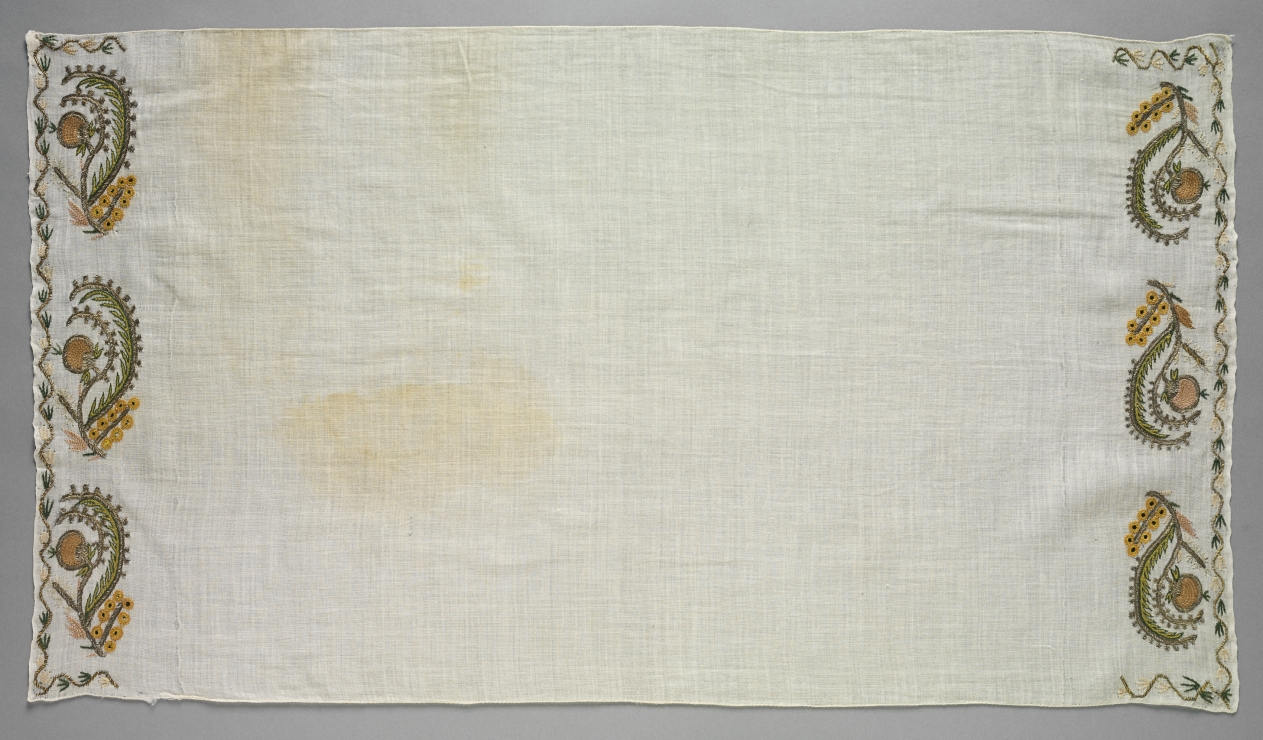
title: Embroidered Towel (Peshkir)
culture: Turkey, 19th century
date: 19th century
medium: embroidery: silk and metal strips on cotton tabby ground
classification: Embroidery